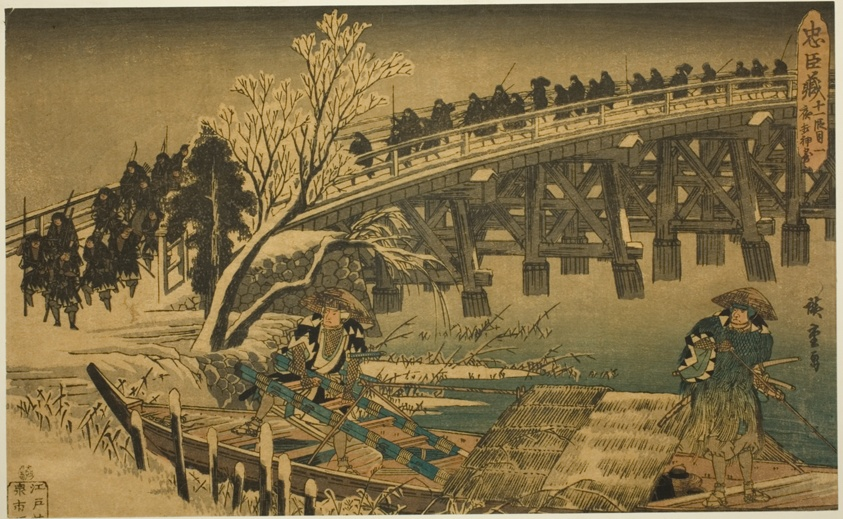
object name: Print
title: Act 11, Part 1: The Approach to the Night Attack (Juichidanme ichi, yochi oshiyose), from the series "The Revenge of the Loyal Retainers (Chushingura)"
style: Japanese (culture or style)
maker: Utagawa Hiroshige 歌川 広重; Japanese, 1797-1858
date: c. 1834/39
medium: Color woodblock print; oban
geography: Japan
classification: woodblock print; print; asian art